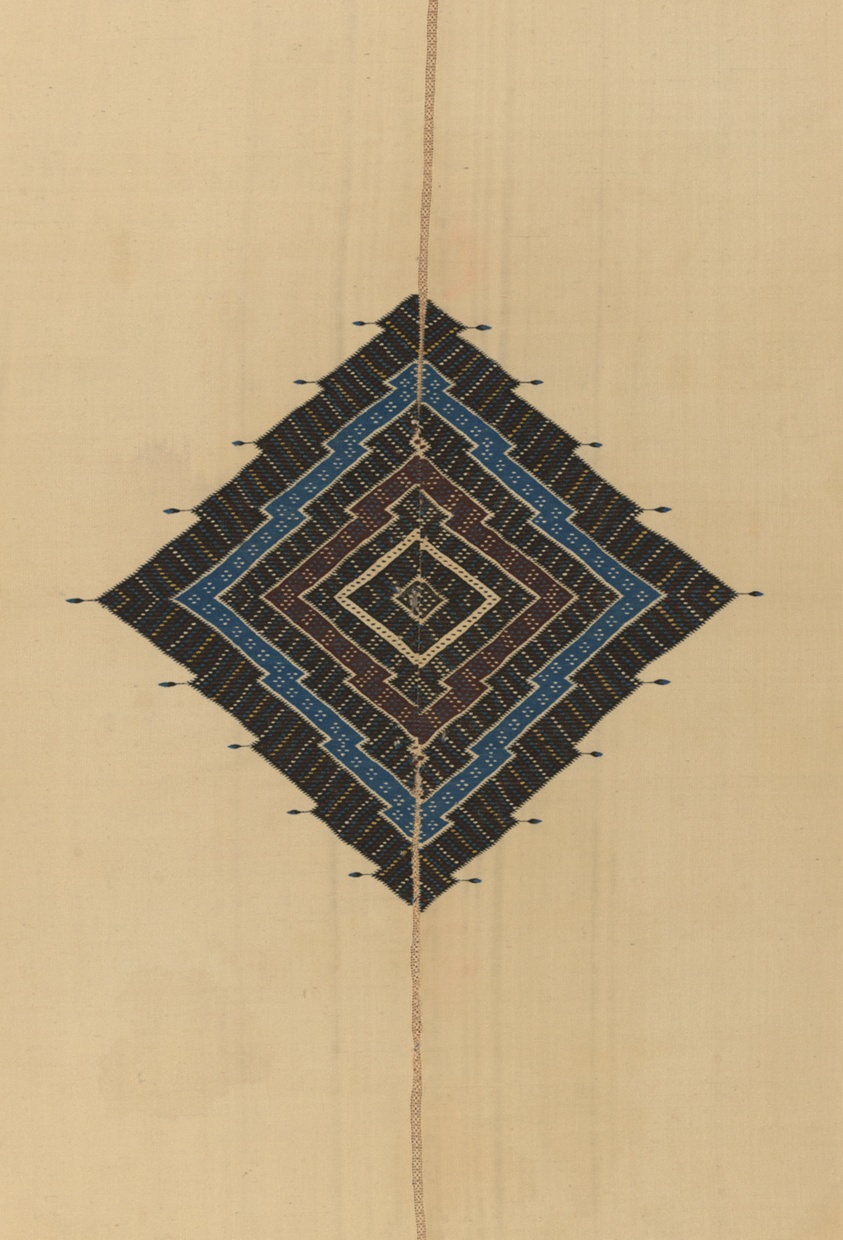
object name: Textile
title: Sarape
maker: Saltillo, Mexico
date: before 1800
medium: Cotton and wool, tapestry weave; joined with cotton, needle-made knotted insert; plied and knotted warp fringe; two loom widths joined; all selvages present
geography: Saltillo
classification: textile; weaving; needlework (visual works); costume; dress (garment); clothing